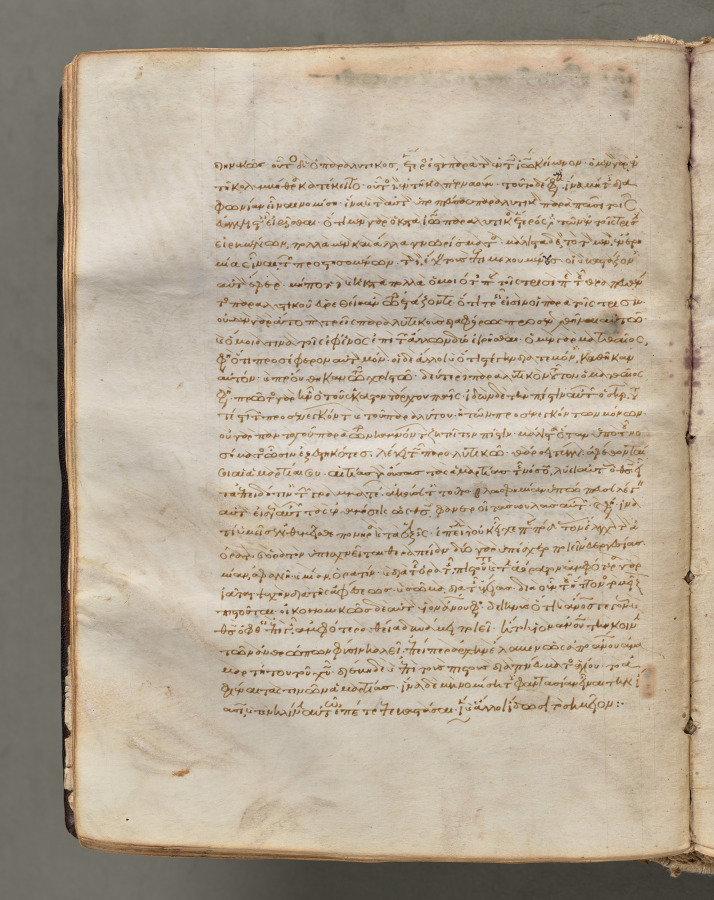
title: Text, folio 37 (verso), from a Gospel Book with Commentaries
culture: Byzantium, Constantinople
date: c. 1000–1100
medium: ink, tempera, and gold on vellum; leather binding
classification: Bound Volume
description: Each of the four gospels in this book opens on a page with brilliantly illuminated borders depicting the author of the text as well as birds-principally peacocks, symbols of the immortality of the soul-and fountains, representing the fountain of life and the salvation of the soul. This volume consists of 428 leaves with texts in Greek. Its level of sophistication suggests that it was probably written and decorated in a monastery in Constantinople.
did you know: Gospel Books were carried in procession through Byzantine churches.